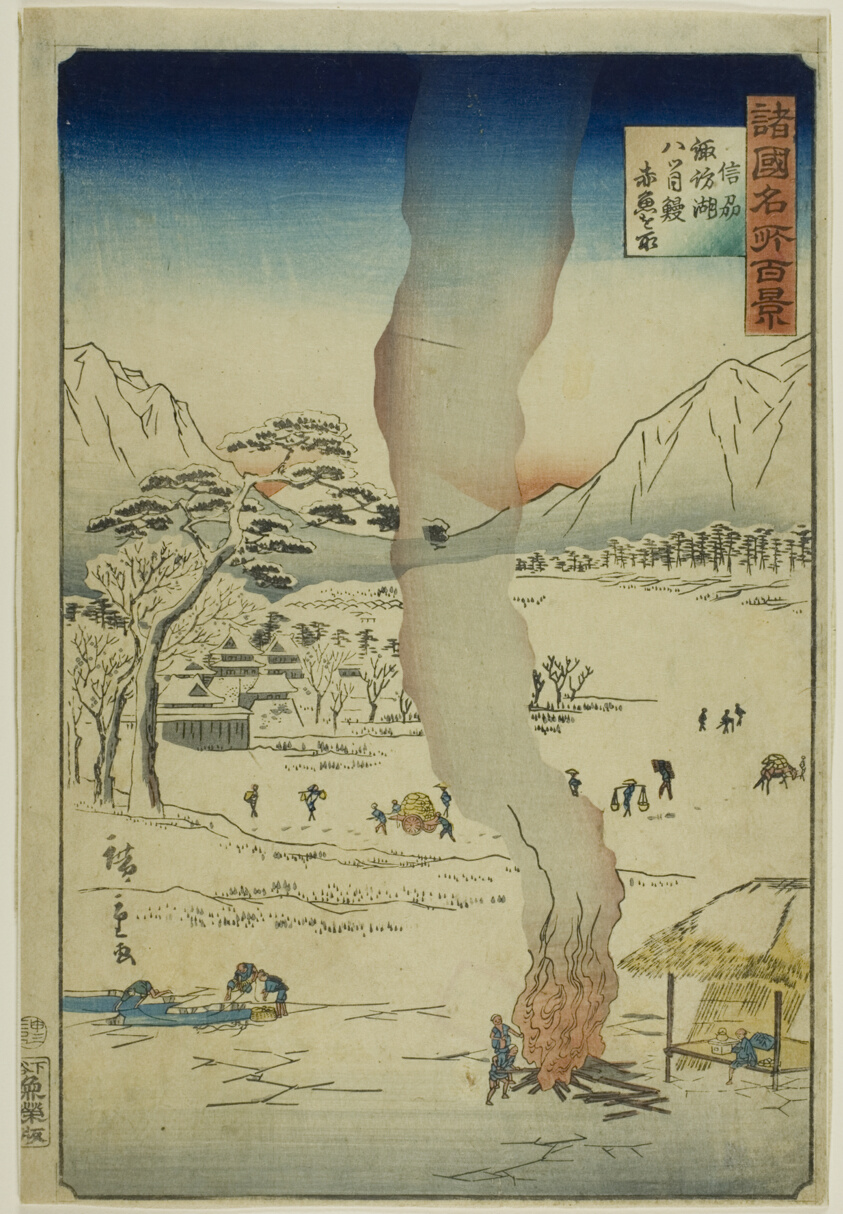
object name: Print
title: Catching Lampreys, Eels, and Red Rockfish on Lake Suwa, Shinshu Province from the series “One Hundred Famous Views in the Various Provinces (Shokoku meisho hyakkei)”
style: Japanese (culture or style)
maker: Utagawa Hiroshige II (Shigenobu) (Japanese, 1826–1869)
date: 1860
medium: Color woodblock print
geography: Japan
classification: woodblock print; print